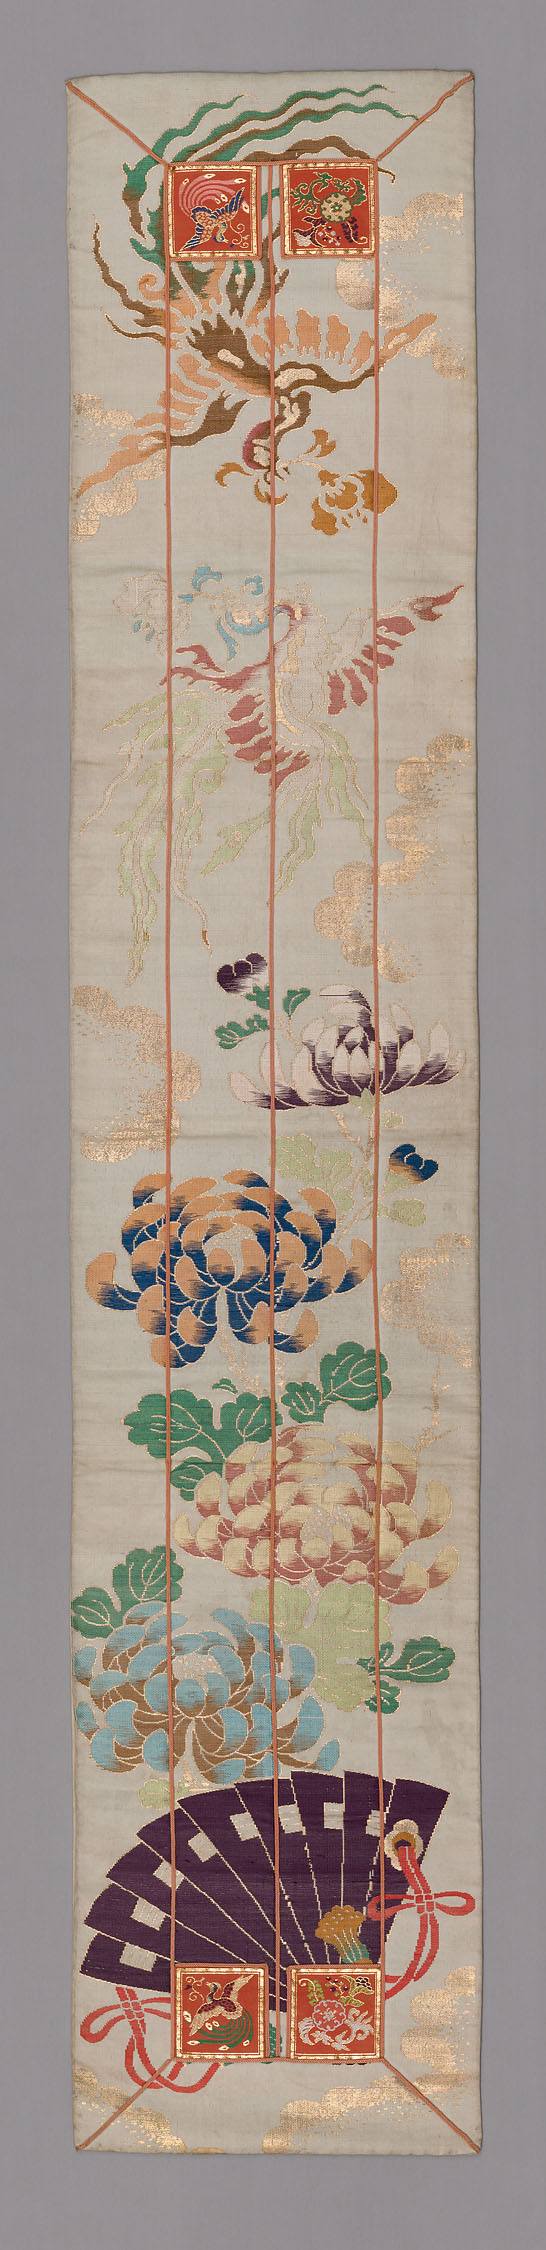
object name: Textile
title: Ôhi (Stole)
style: meiji, Japanism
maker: Japan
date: Meiji period (1868–1912), 1875/1900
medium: Silk, gold-leaf-over-lacquered-paper strip, warp-float faced 2:1 'Z' twill weave with weft-float faced 1:2 'Z' twill interlacings of secondary binding warps and supplementary patterning wefts; edged with cords; lined with cotton, plain weave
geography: Japan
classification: textile; liturgical - buddhist; weaving